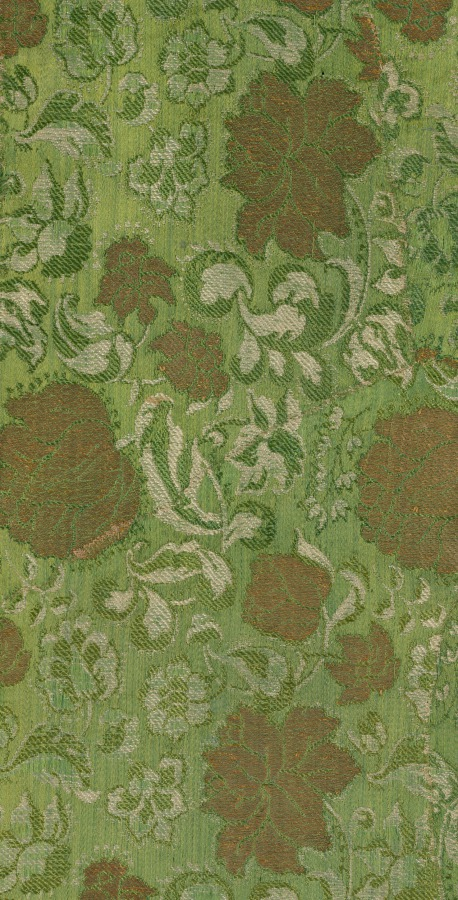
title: Textile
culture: Italy, early 18th Century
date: c. 1700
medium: lampas weave, silk and gold thread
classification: Textile